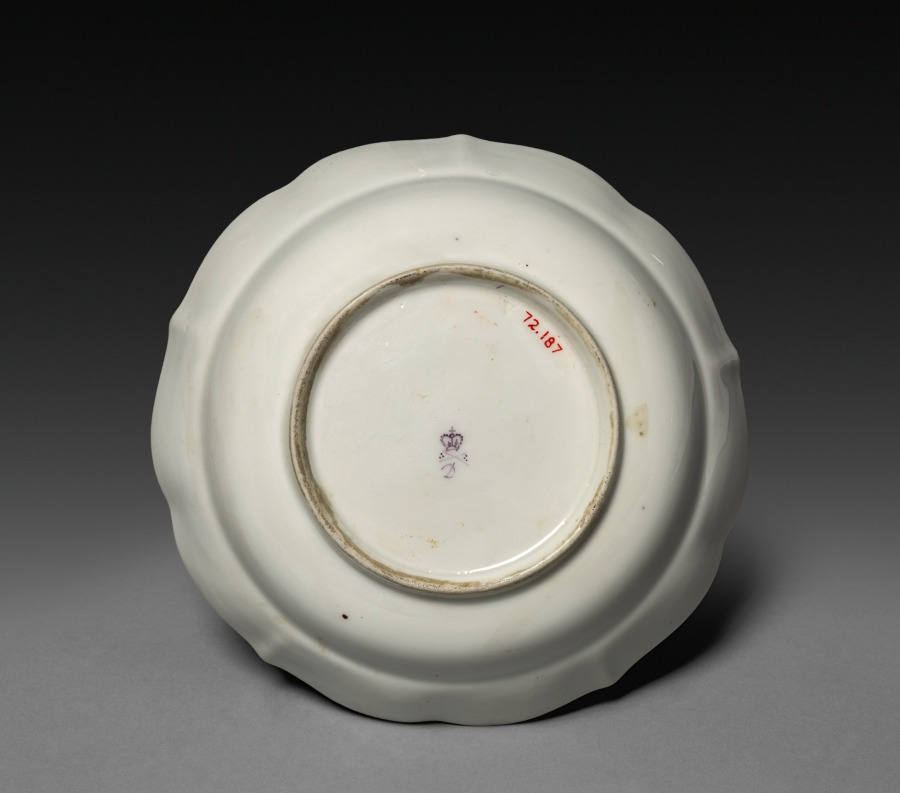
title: Bowl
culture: England, Derby, 18th century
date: c. 1790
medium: soft-paste porcelain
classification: Ceramic